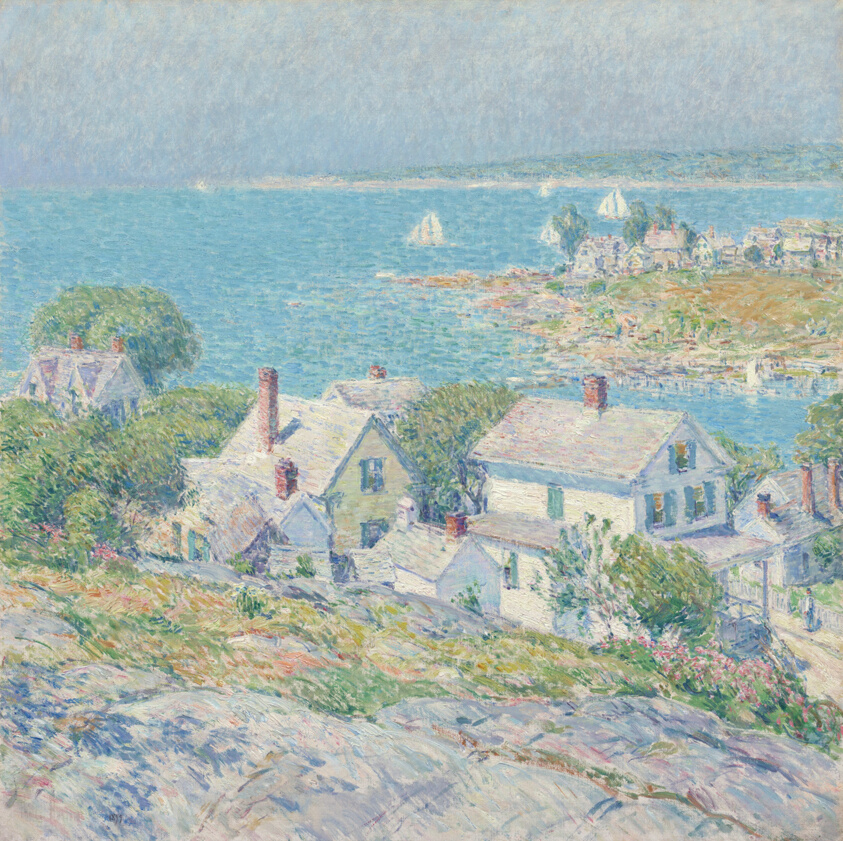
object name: Painting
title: New England Headlands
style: Impressionism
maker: Childe Hassam (American, 1859–1935)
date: 1899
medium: Oil on canvas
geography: Gloucester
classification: painting; american arts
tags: landscapes, weather/seasons, water, Century of Progress, world's fairs, Chicago World's Fairs, architecture